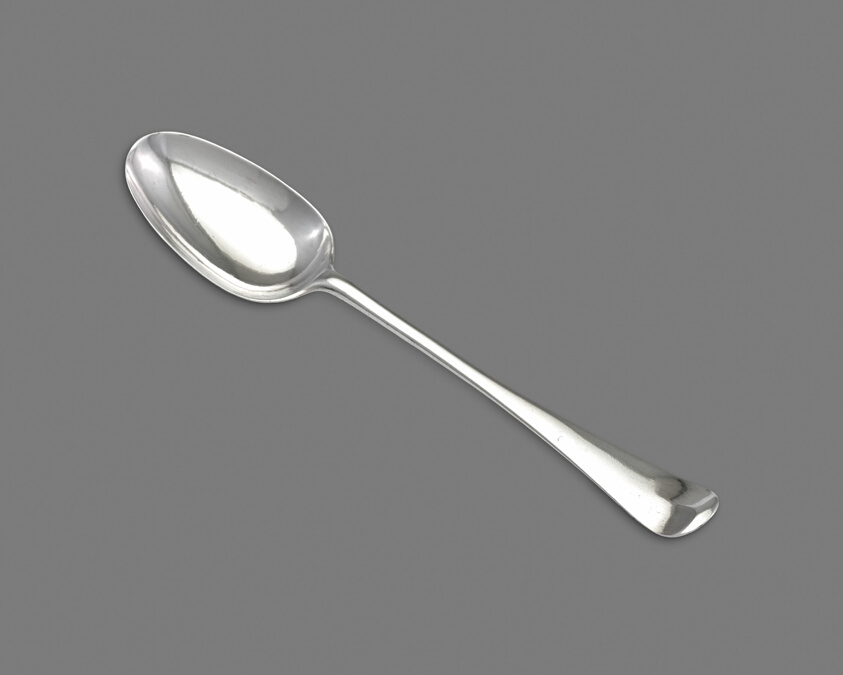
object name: Metalwork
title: Spoon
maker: Paul Revere Jr.; American, 1734–1818; Boston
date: 1754–95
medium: Silver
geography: Boston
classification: spoon; silver; utensil; american decorative arts; american arts; decorative arts